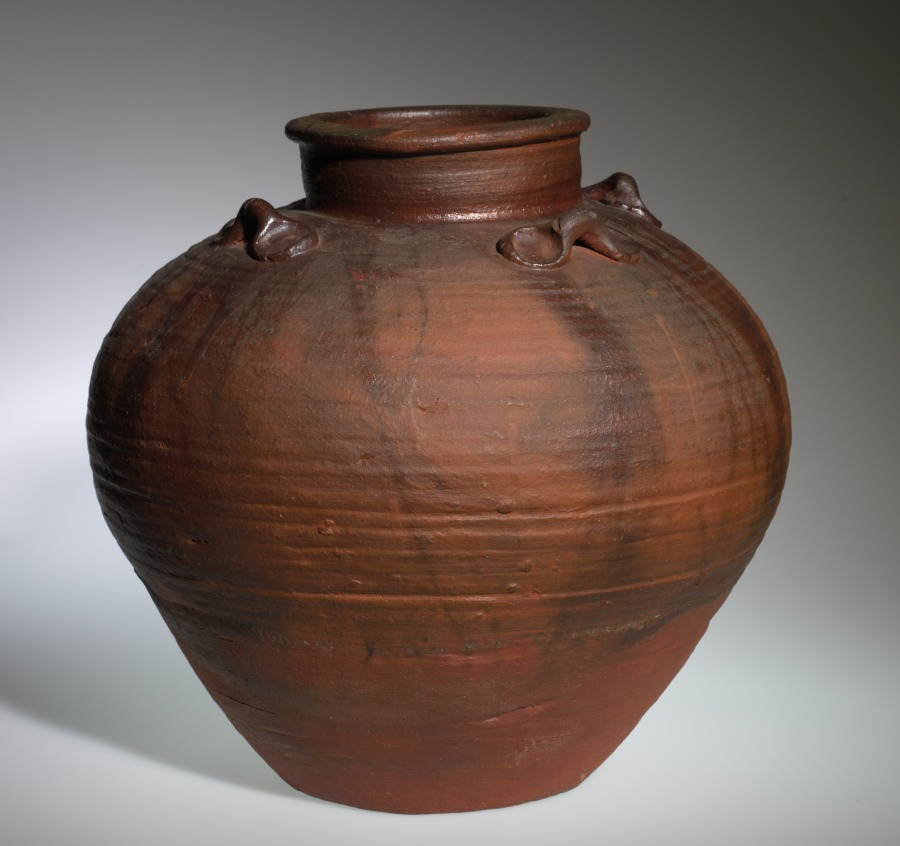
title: Tea Storage Jar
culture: Japan, Momoyama period (1573–1615)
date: c. 1600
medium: Stoneware with natural ash glaze and fire mark (hidasuki) decoration (Bizen ware)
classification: Ceramic